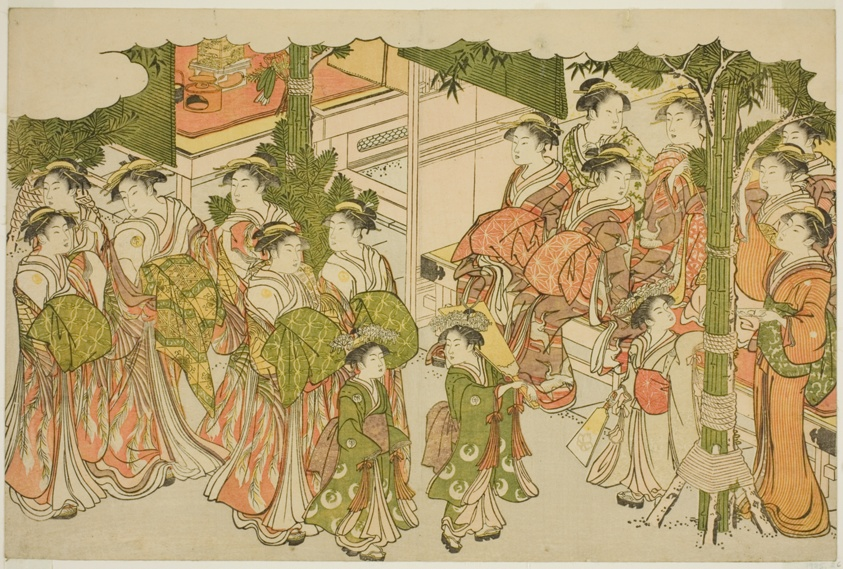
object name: Print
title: The First Garments of the New Year (Kiso hajime), from the illustrated book "Colors of the Triple Dawn (Saishiki mitsu no asa)"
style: Japanese (culture or style)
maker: Torii Kiyonaga (Japanese, 1752-1815)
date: c. 1787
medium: Color woodblock print; oban, page from an illustrated book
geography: Japan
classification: woodblock print; print; asian art